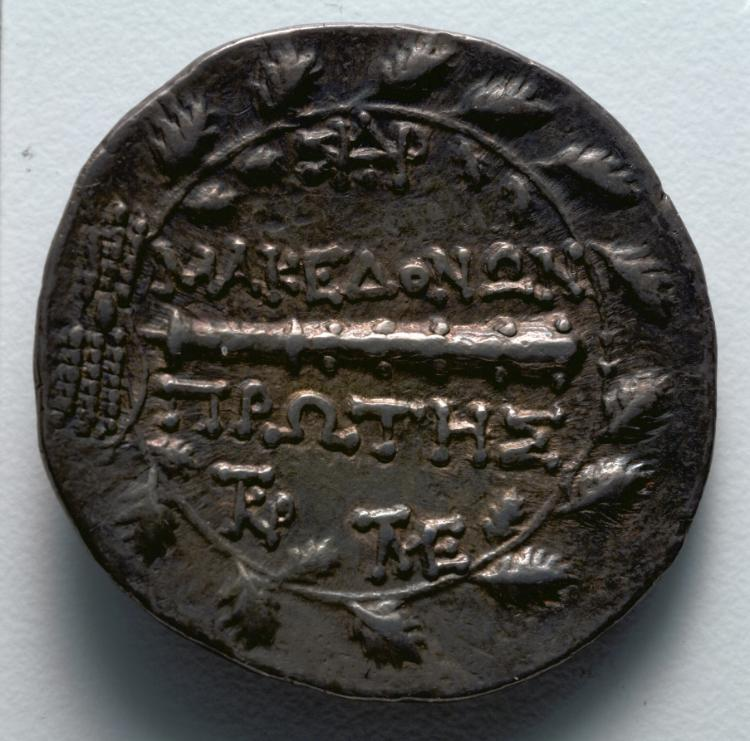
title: Tetradrachm: Club within Wreath (reverse)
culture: Greek, Macedonian, minted at Amphipolis (Macedonia), under Roman control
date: 158–150 BCE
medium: silver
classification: Coins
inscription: ΜΑΚΕΔΟΝΩΝ ΠΡΩΤΗΣ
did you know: Three monograms around the border of the reverse identify officials responsible for producing this coin.